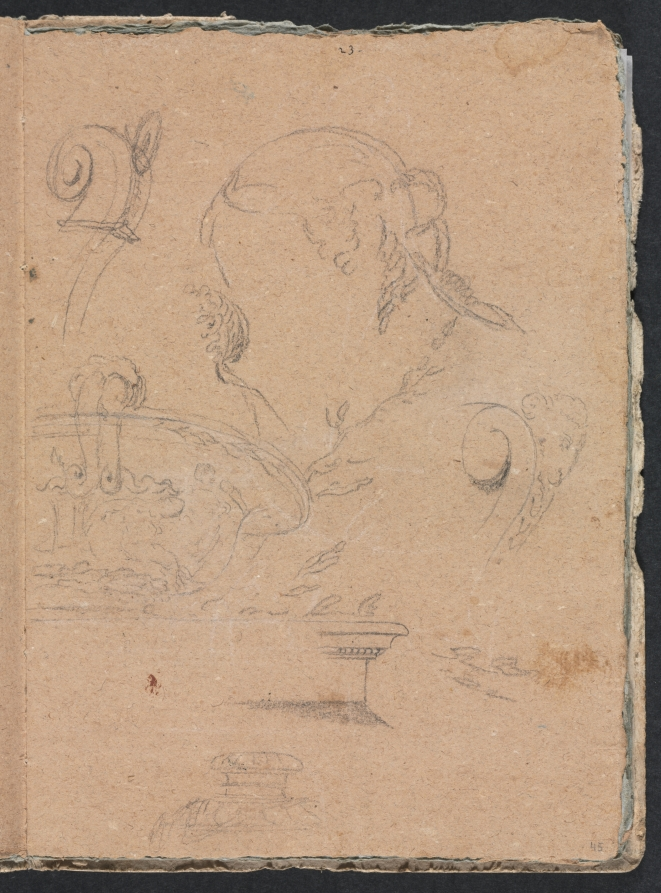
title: Verona Sketchbook: Architectural motifs with female head (page 45)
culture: Italy, 18th century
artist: Francesco Lorenzi (Italian, 1723–1787)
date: 1760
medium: black chalk with white heightening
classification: Bound Volume